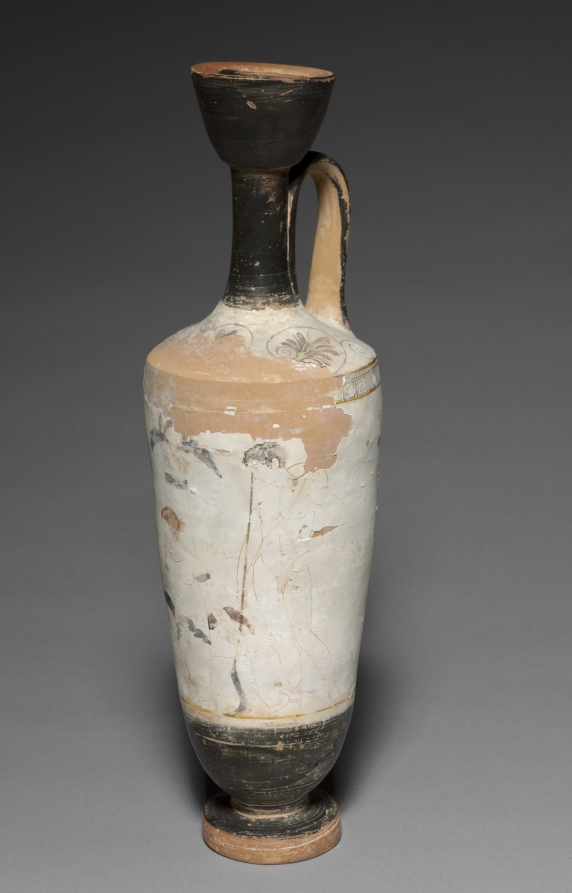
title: White-Ground Lekythos (Oil Vessel): Mourners at Tomb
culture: Greek, Attic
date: c. 400s BCE, with modern painting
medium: ceramic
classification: Ceramic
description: In its basic shape and decorative scheme—three figures before a stepped tomb marker—this lekythos resembles hundreds of funerary vessels made in Athens during the fifth century (400s) BC. But unusual features of the painted decoration, including the multicolored palmettes on the shoulder, and the shoes worn by the youth, suggest a modern intervention. Zinc found in analysis of the white ground is also likely modern, although the vessel itself may be ancient.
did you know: Both stylistic and technical studies suggest that this vase is not wholly ancient.